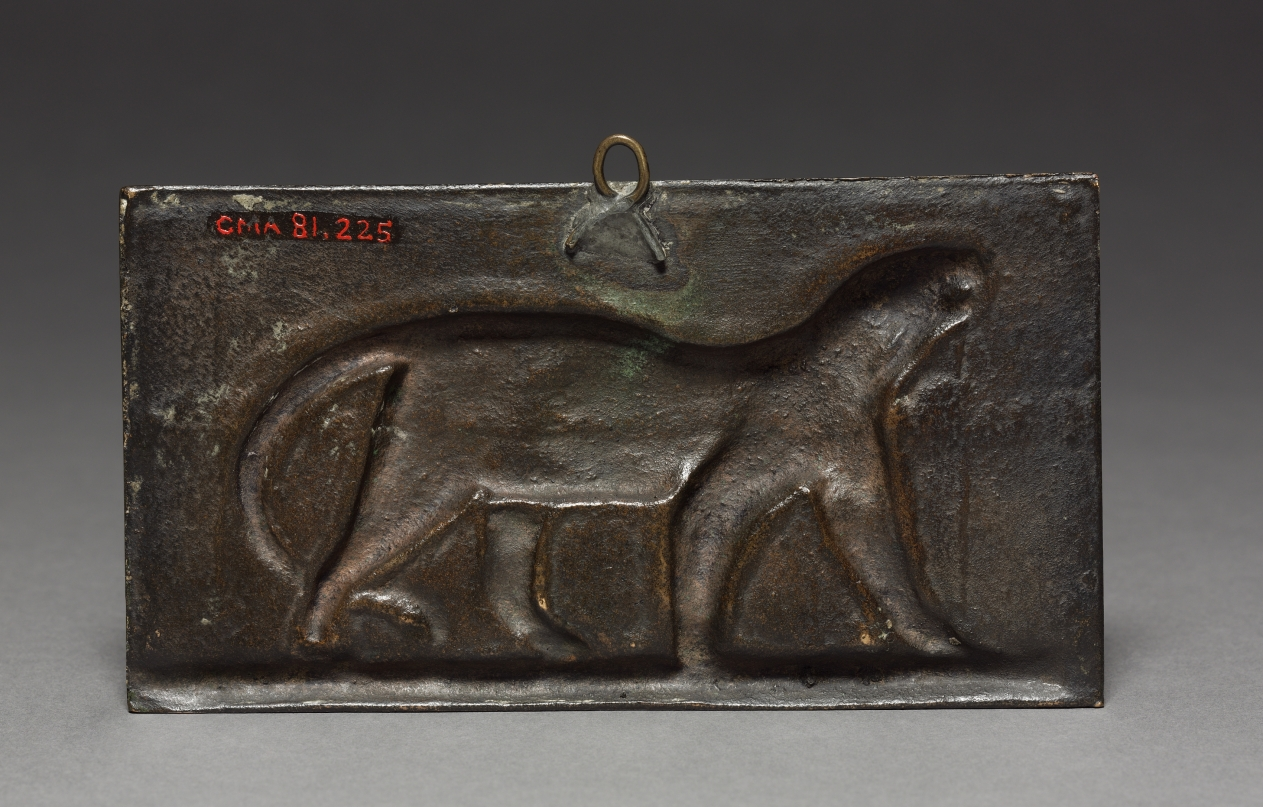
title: Walking Leopard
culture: France, 19th century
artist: Antoine-Louis Barye (French, 1796–1875)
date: 1831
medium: bronze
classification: Sculpture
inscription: Inscribed right edge: "BARYE 1831"